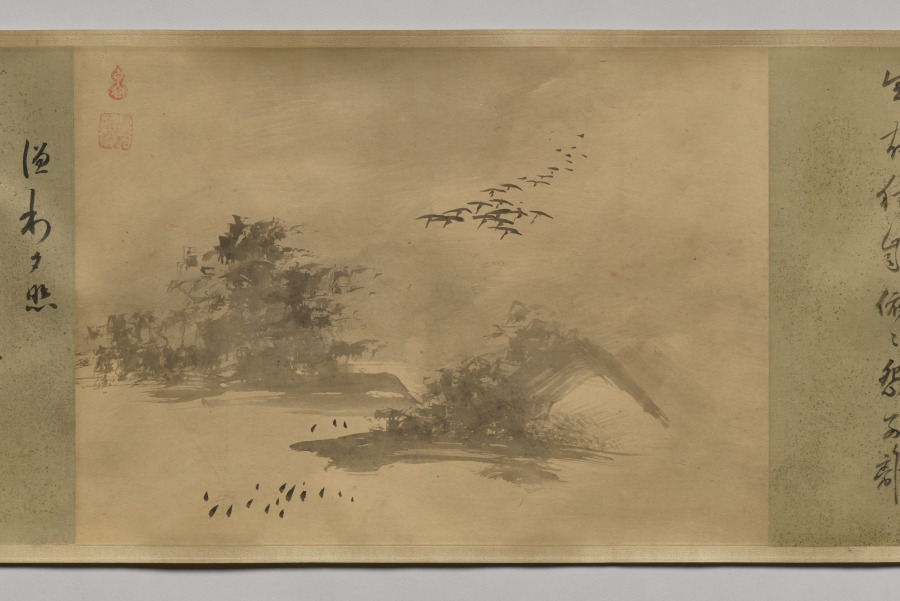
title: Poems and Pictures of the Eight Views of Xiao-Xiang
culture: Japan, Momoyama period (1573–1615)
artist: Unkoku Tōgan (Japanese, 1547–1618)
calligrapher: Inkei Gentetsu (Japanese, 1562–1612)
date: 1605–12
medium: Handscroll; ink on paper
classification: Painting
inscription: Each painting sealed with red gourd-shaped seal reading Unkoku (雲谷) and a square seal reading Tōgan (等顔).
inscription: Each painting prefaced with a titled poem on the Eight Views of Xiao-Xiang by Yujian Ruofen (active late 13th century) inscribed by Japanese Buddhist monk Inkei Gentetsu (1562–1612).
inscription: 右寫玉㵎之筆勢／雪舟末葉等顔筆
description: Unkoku Tōgan brushed these scenes using the splashed-ink technique associated in Japan with the Chinese monk Yujian Ruofen (active late 1200s). Xiao-Xiang refers to the region in present-day Hunan province, where the Xiang River and its tributaries converge. Each of the eight views evokes a time of day or season. The earliest surviving series of Xiao-Xiang paintings is by Wang Hong (active mid-1100s), but textual evidence tells us the theme appears earlier. It was later adopted in Japan and Korea, as seen here. The poems were inscribed by Inkei Gentetsu, the third abbot of the Rinzai Zen temple Tōshunji, Japan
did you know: The “Tō” of Tōgan comes from the name of painter Sesshū Tōyō (1420–1506).